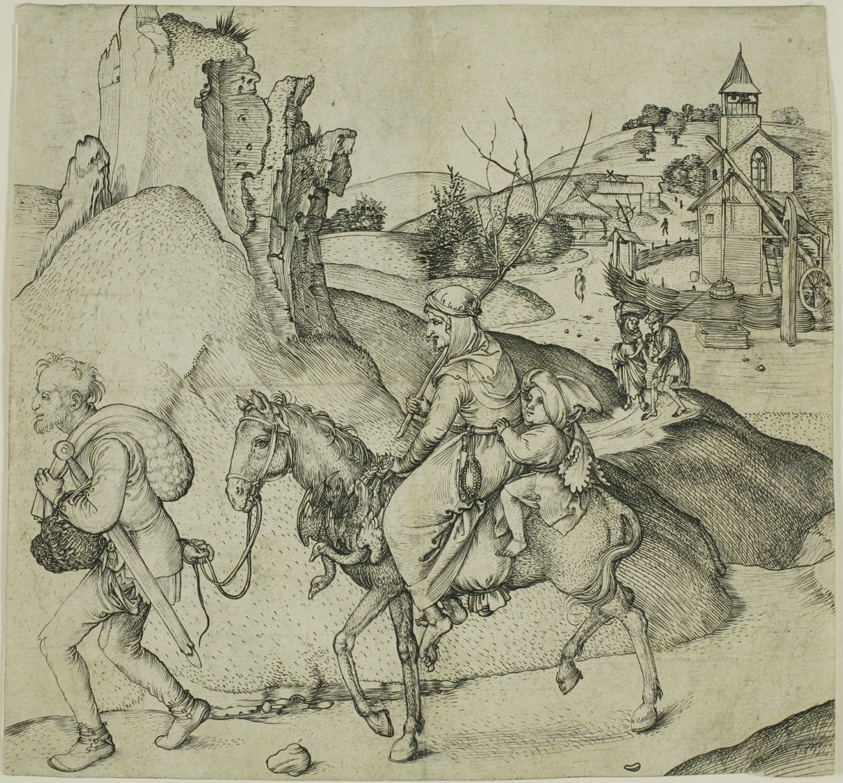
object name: Print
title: Peasant Family Going to Market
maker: Martin Schongauer (German, c. 1430/50-1491)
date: 1469/74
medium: Engraving on paper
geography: Germany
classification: engraving; print; prints and drawing